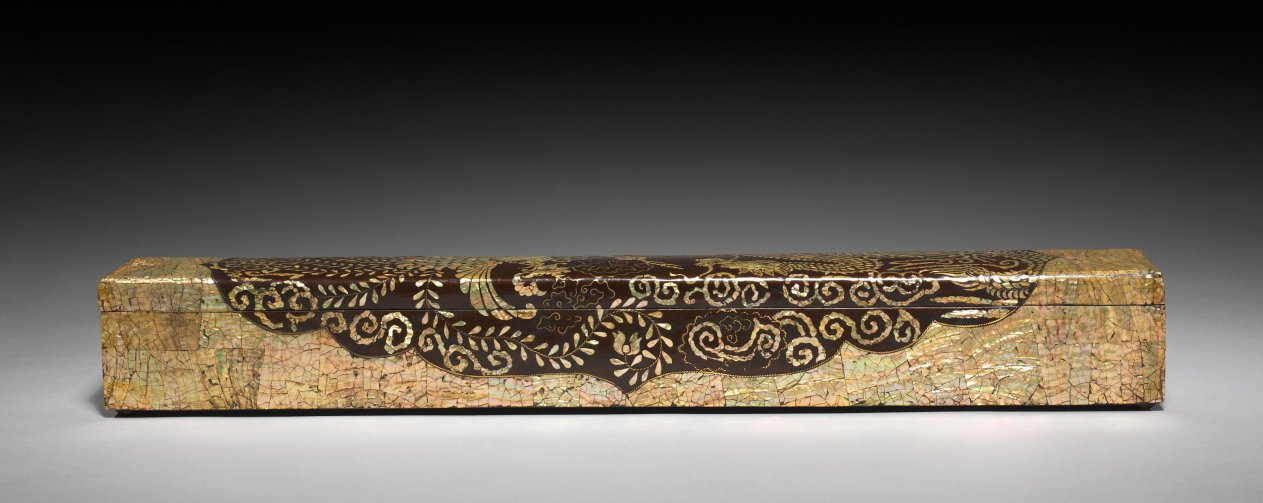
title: Scroll Box with Dragon and Phoenix Design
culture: Korea, Joseon dynasty (1392–1910)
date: 1800s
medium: lacquered wood inlaid with mother-of-pearl and twisted brass and copper wire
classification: Lacquer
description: This large rectangular box was designed for keeping a scroll or an important document. The mother-of-pearl inlaid lacquer rendering of a dragon and phoenix combines texture, color, and shape to produce a dazzling effect. The large and prominent designs of the Joseon-period inlaid lacquer, like on this box, replaced the fine detail and mosaic-like patterns popular in the Goryeo period (918-1392).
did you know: This technique of using the inlays of iridescent mother-of-pearl and abalone shells has been practiced in Korea for over a thousand years,